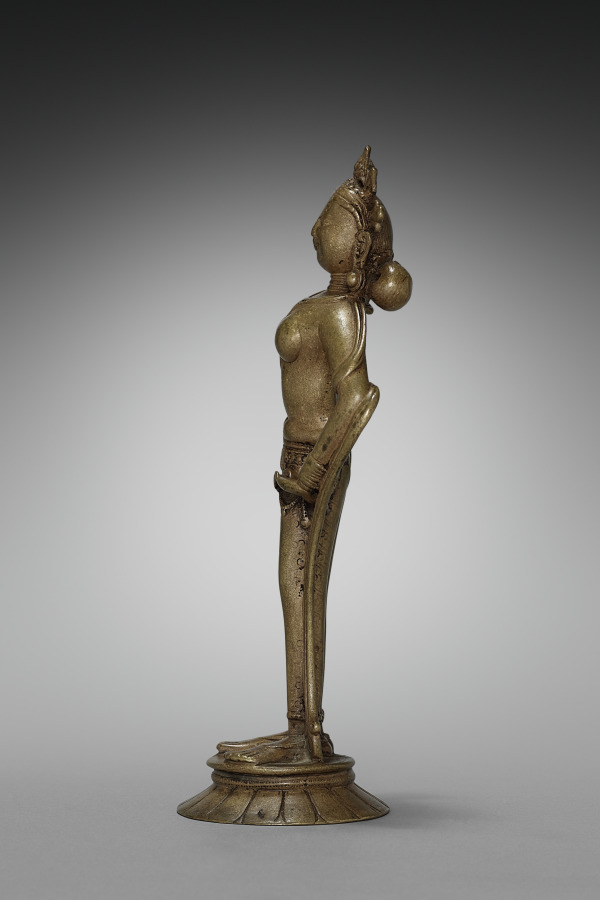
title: Standing Devi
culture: India, Ladakh, 12th century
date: 1100s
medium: brass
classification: Sculpture